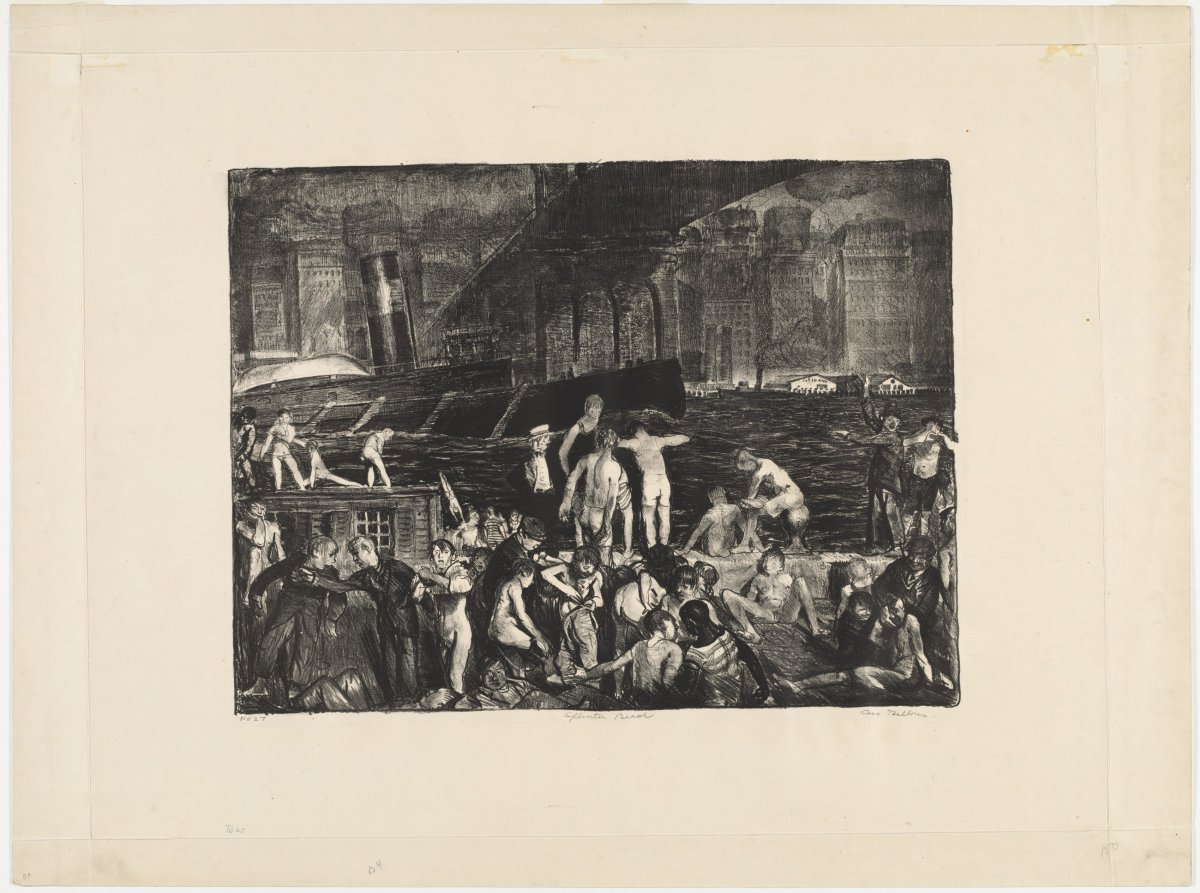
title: Splinter Beach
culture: America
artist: George Bellows (American, 1882–1925)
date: 1916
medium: lithograph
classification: Print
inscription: In graphite, lower left, recto: "No 27"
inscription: In graphite, center, recto: "Splinter Beach"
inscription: In graphite, lower right, recto: "Geo. Bellows"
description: During George Bellows’s first decade in New York City, starting in 1904, newspapers ran many stories about the “social problem” of the urban poor, reporting that the city’s tenement district lacked cleanliness and order. Drawn to this unvarnished side of city life, Bellows made several images of the public docks along the East River that were unofficial places of recreation for the city’s tenement children. Both Splinter Beach and River-Front feature, without sentimentality, children that display their nakedness unabashedly. Disturbingly, both images feature fully clothed adults observing or even touching children, as well as other sexual touching. Portrayals of sexual indecency in Bellows’s work aligned with the off-color humor often found in fictional representations of the urban poor of the time.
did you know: Splinter Beach was located under the Brooklyn Bridge, the underside of which can be seen in this image.